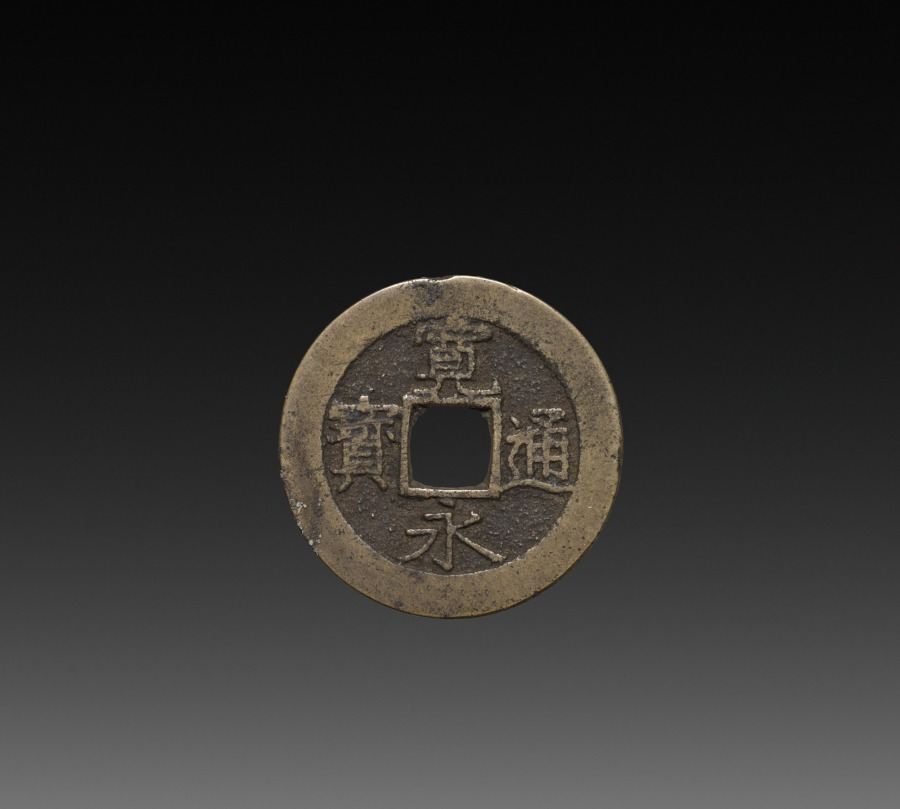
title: Four Mon Kan'ei Tsūhō Coin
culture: Japan, Edo period (1615–1868)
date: 1768–1868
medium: copper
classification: Coins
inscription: 寛永通寳